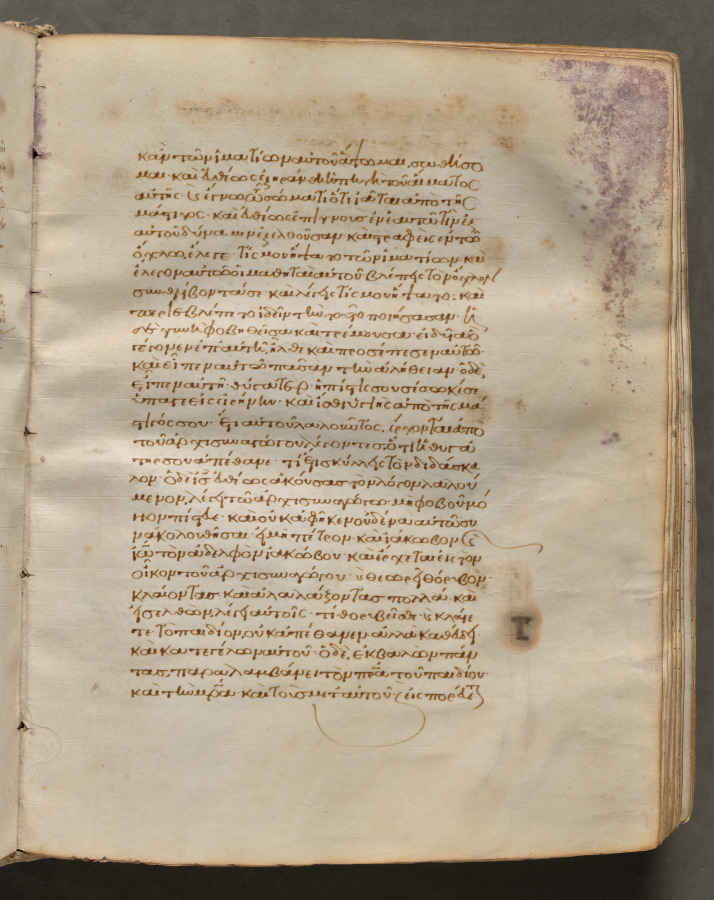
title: Text, folio 149 (recto), from a Gospel Book with Commentaries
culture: Byzantium, Constantinople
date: c. 1000–1100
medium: ink, tempera, and gold on vellum; leather binding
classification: Bound Volume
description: Each of the four gospels in this book opens on a page with brilliantly illuminated borders depicting the author of the text as well as birds-principally peacocks, symbols of the immortality of the soul-and fountains, representing the fountain of life and the salvation of the soul. This volume consists of 428 leaves with texts in Greek. Its level of sophistication suggests that it was probably written and decorated in a monastery in Constantinople.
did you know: Gospel Books were carried in procession through Byzantine churches.